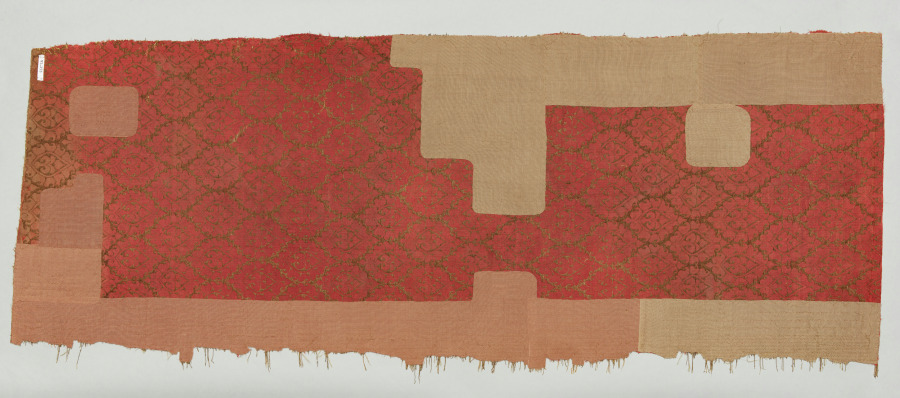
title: Textile with Palmettes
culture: Central Asia, Il-khanid (Mongol) period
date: 1200s–1300s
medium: Silk and gold thread; tabby with supplementary weft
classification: Textile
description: Designs of repeated ogives were popular in Central Asia and survive in a number of variations. Usually, the ogival frame encloses a floral motif, as in this example. Sometimes paired animals occur instead. Silks with this type of pattern were exported to Western Asia and to Europe, where they inspired textile designs woven locally. Mongol silks with exotic floral and animal patterns were acquired for use as clothing and furnishings by the clergy and nobility. They were also used by painters as models for hangings or garments.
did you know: Some of the original coral-red background can be seen along the edges, where it hasn't faded to off-white.